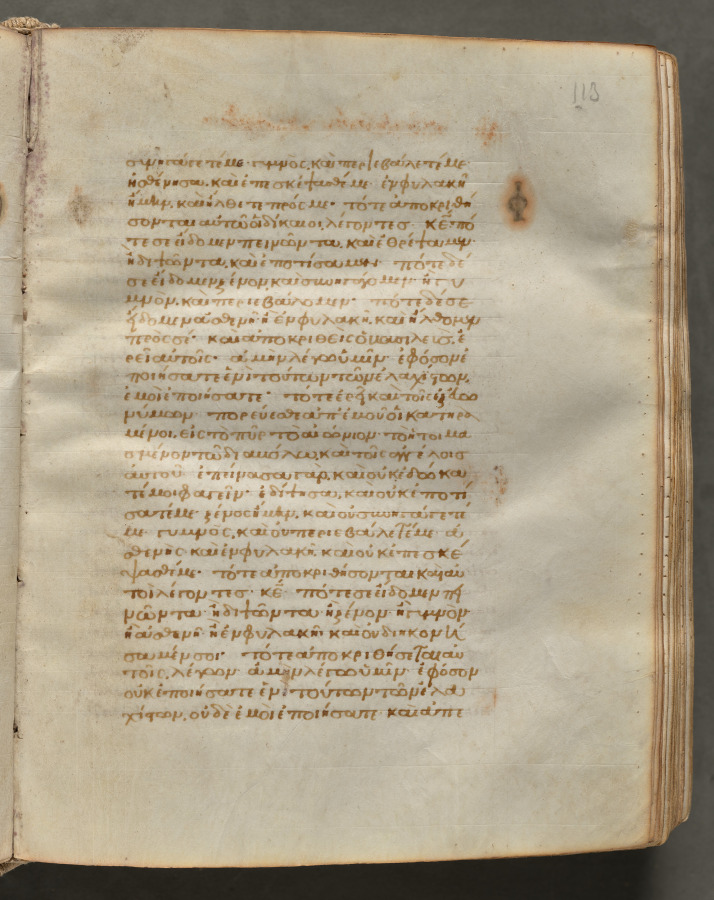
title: Text, folio 113 (recto), from a Gospel Book with Commentaries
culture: Byzantium, Constantinople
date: c. 1000–1100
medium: ink, tempera, and gold on vellum; leather binding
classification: Bound Volume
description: Each of the four gospels in this book opens on a page with brilliantly illuminated borders depicting the author of the text as well as birds-principally peacocks, symbols of the immortality of the soul-and fountains, representing the fountain of life and the salvation of the soul. This volume consists of 428 leaves with texts in Greek. Its level of sophistication suggests that it was probably written and decorated in a monastery in Constantinople.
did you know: Gospel Books were carried in procession through Byzantine churches.